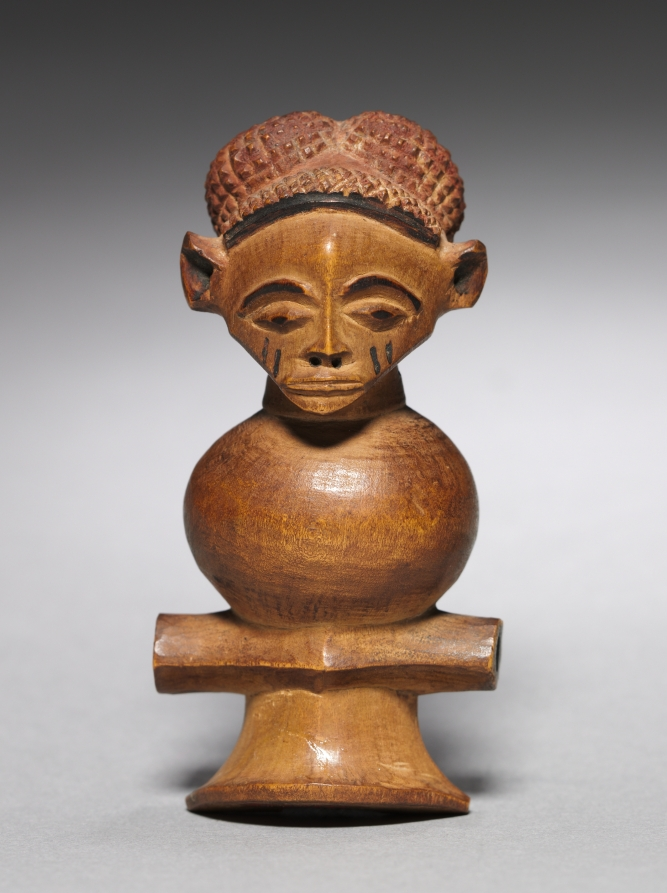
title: Whistle (kasengosengo)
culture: Africa, Central Africa, Democratic Republic of Congo, Pende-style maker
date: before 1915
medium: wood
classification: Musical Instrument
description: This small whistle displays a finely detailed head with bi-lobed coiffure similar to Pende masks.